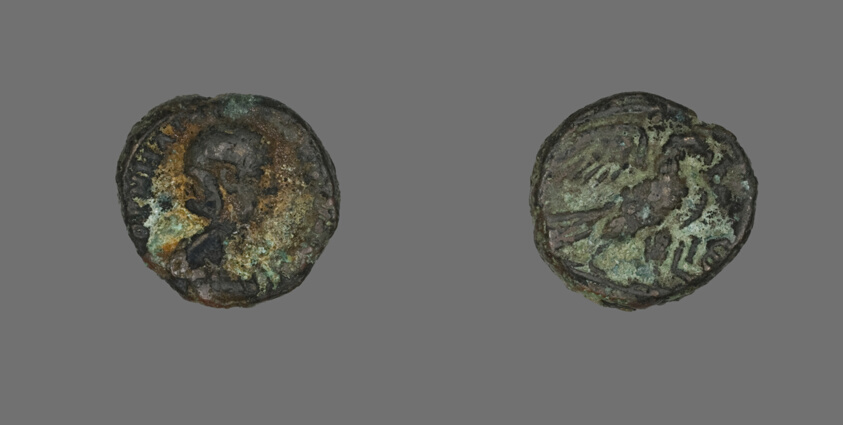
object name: Coin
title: Tetradrachm (Coin) Portraying Empress Salonina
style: greco-roman (egyptian)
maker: Roman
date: 267-268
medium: Billon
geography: Alexandria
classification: coin; ancient art